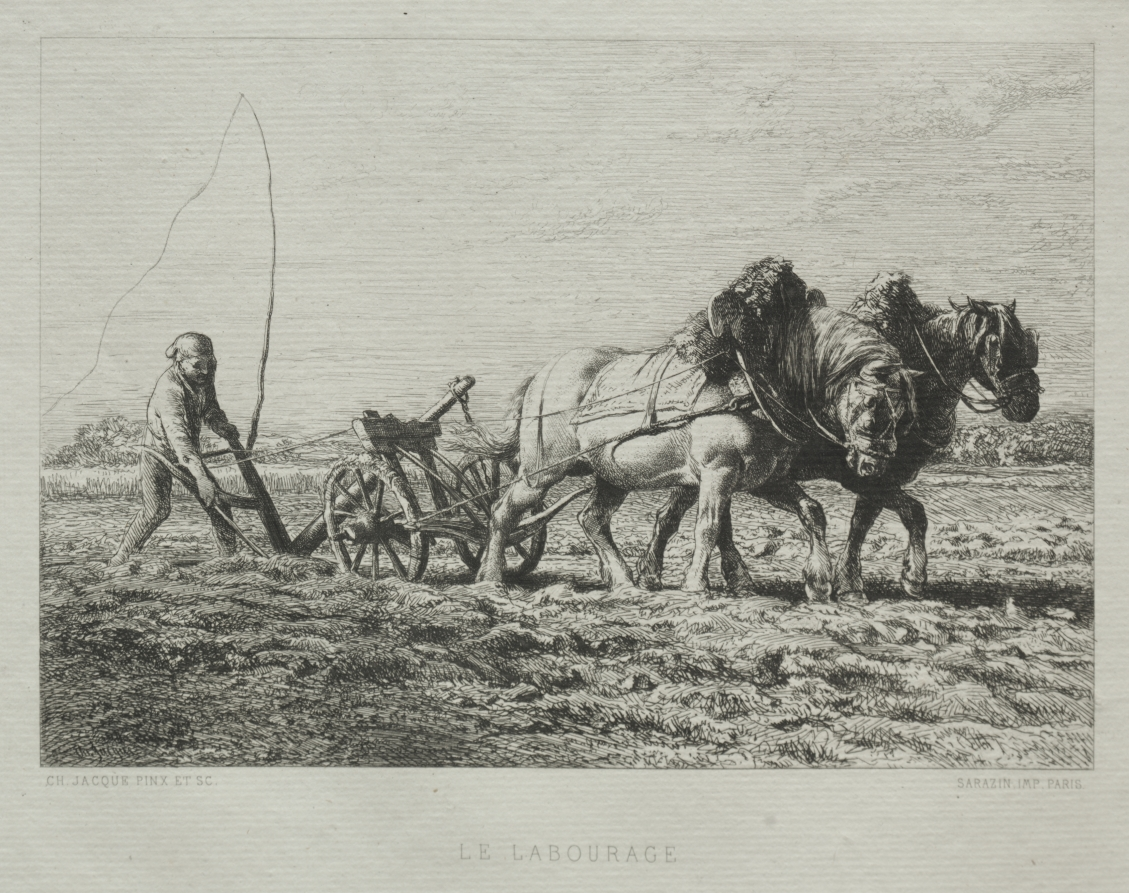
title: Ploughing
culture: France, 19th century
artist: Charles-Émile Jacque (French, 1813–1894)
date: 1864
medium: etching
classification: Print